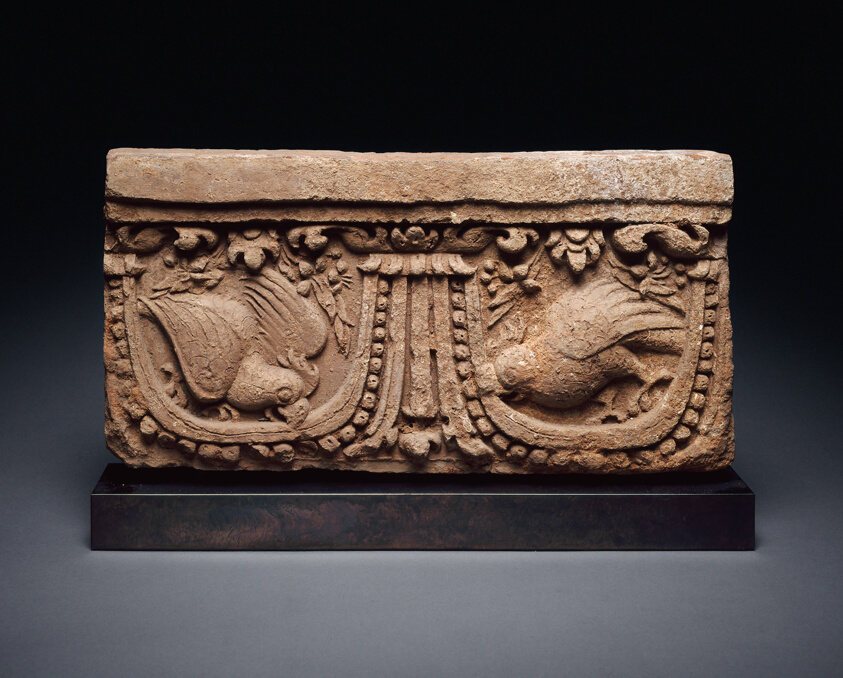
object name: Architectural fragment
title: Architectural Panel with Parrots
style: Southeast Asian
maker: Indonesia; Java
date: 9th/10th century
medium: Terracotta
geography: Java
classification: earthenware; ceramics; sculpture; asian art; architectural fragment